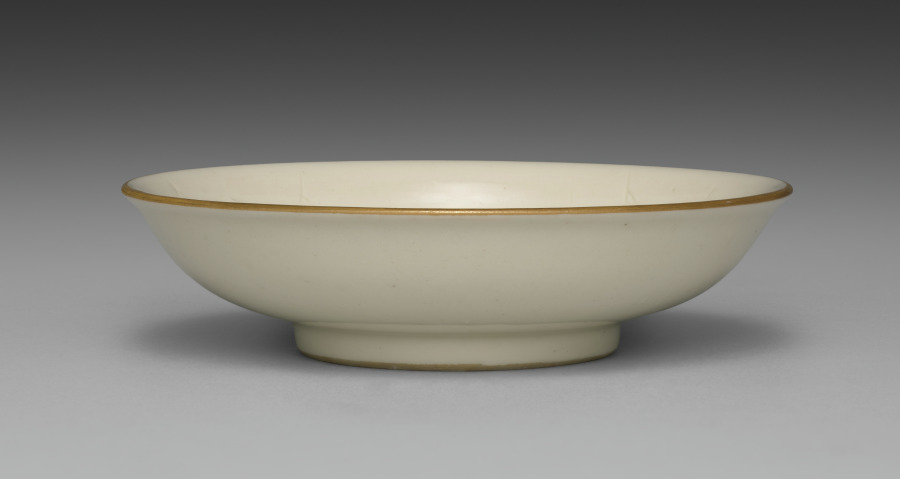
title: Small Dish from Dining Set with Plum Blossoms and Cracked-Ice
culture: Japan, Meiji period (1868–1912)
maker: Seifū Yohei II (Japanese, 1844–1878)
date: c. 1875–78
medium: Porcelain with molded designs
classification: Ceramic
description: Each item in this set has a delicate low-relief design of flowering plum branches over scattered, intersecting lines meant to resemble the cracked-ice surface of a frozen body of water and is signed on the base in gold pigment. While Yohei II produced many fine works in underglaze blue, like those produced by Kiyomizu Shichibei, he also made works in quite different styles later in his career, from the early 1870 s. In 1873, he was appointed purveyor to the Industrial Center of Kyoto Prefecture, a designation associated with Kyoto’s efforts to reach an international market through the port of Kobe; and from 1875 until his death, he was involved in national-level projects to present Japanese ceramics across the world. It was during this period that Yohei III was apprenticed to Yohei II, and it has been suggested that this set may in fact be an early example of Yohei III’s work, which he signed with his teacher’s name. Decorated with flowers resembling Japanese textile motifs, the set calls to mind the design of Yohei II’s pair of vases with plum blossoms in the Victoria and Albert Museum. Here, the elaborate trees created for a formal public exhibition setting have been translated into the approachable blossoms of the genteel domestic environment. While the designs are consistent across the pieces, each raised flower petal and pistil and each incised line in the ice was done by hand, so the cups, bowls, and dishes are similar yet unique. The bottoms of two boxes once identified the set’s owner, but the information has been deliberately obscured with black ink. However, inscriptions still visible appear to indicate two occasions, once at the end of July 1886 , and once again in June 1916 , when parts of the set were requested from Hokura in Niigata Prefecture. The location corresponds to a neighborhood in the present-day city of Jōetsu. The surname Tsuji 辻 also appears on a paper tag affixed to one of the box cloths. Future research may possibly reveal more about their provenance. A vase by Yohei III in a private collection combines the formal grandeur of the Yohei II vases in the Victoria and Albert Museum with the gentler design of this dining set, placing flowering plum trees against soft, scalloped-edge clouds resembling those in golden screens.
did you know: The dining wares have a creamy white coloration that the four boxes containing them identify as Korean in style.